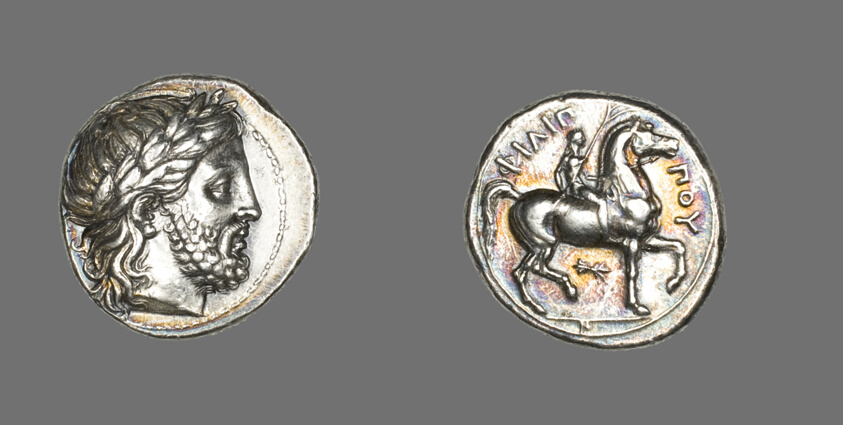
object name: Coin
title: Tetradrachm (Coin) Depicting the God Zeus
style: late classical, Classical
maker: Greek; minted in Pella, ancient Macedon, Greece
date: Reign of Phillip II (359–336 BCE)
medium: Silver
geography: Pella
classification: coin; ancient art